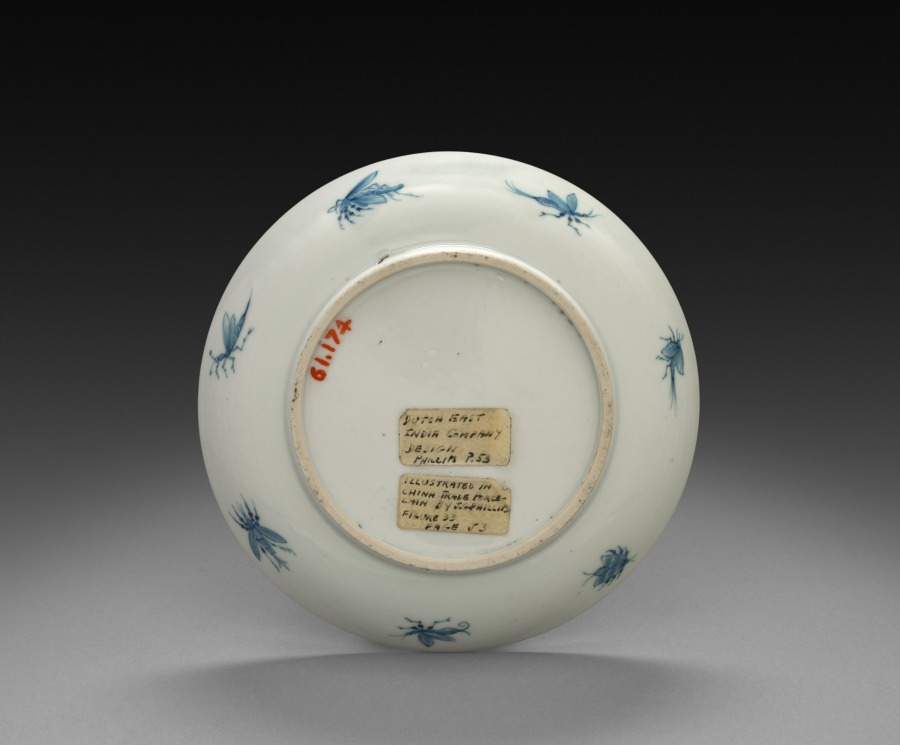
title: Saucer-shaped Dish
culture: China, Chinese Export -- Dutch Market, 18th century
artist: after a design by Cornelis Pronck (Dutch, 1691–1759)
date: c. 1750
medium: porcelain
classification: Ceramic